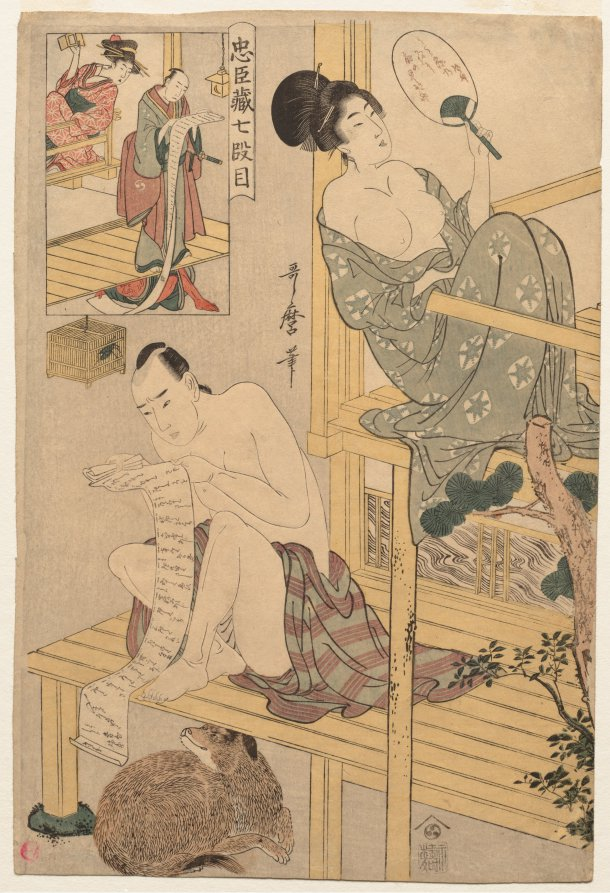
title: Act VII from the series The Storehouse of Loyal Retainers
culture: Japan, Edo period (1615–1868)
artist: Kitagawa Utamaro (Japanese, c. 1754–1806)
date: c. 1801–2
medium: Color woodblock print; ink and color on paper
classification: Print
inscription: Signature: Utamaro hitsu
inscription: Publisher: Nishimuraya Yohachi (Eiju han, emblem)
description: This series gives a famous play a humorous spin by altering the setting and some parts of the narrative. Utamaro kept his jokes accessible by picturing the action of the original episode to the side of the main image for easy reference. In this print, a spy reading a letter is turned into a dog; both can be pronounced inu in Japanese. In the stage version of this scene, the loyal samurai Oboshi Yuranosuke reads an important letter relating details of the plot to avenge the unjust death of his master. The spy Kudayu also reads the note as it unrolls beneath the veranda. On the balcony, the jealous courtesan Okaru believes it to be a love letter from a rival. Utamaro transforms the spy/counterspy episode into a humorous scene on a warm night. A beau reads a love letter, its presence disturbing the dog lying underneath the veranda. On the balcony above, a bored courtesan shows no interest in the scene below as she fans herself to keep cool.